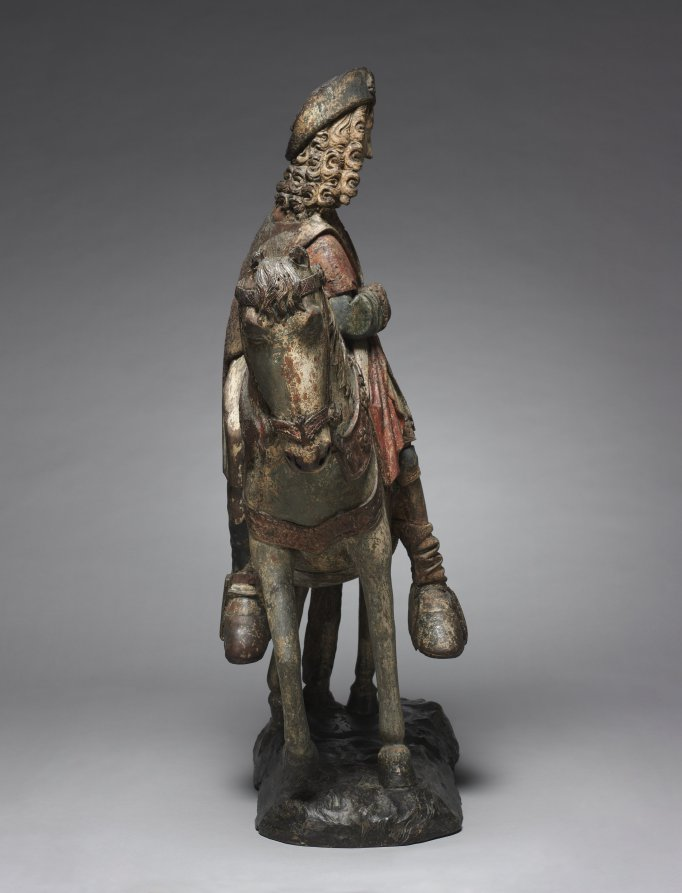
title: Saint Martin of Tours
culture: Northeast France or Flanders, 15th century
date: c. 1480–1500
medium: polychromed walnut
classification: Sculpture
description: According to tradition, Saint Martin was born during the reign of Constantine the Great (306–37 CE) and served as a member of the Roman cavalry in Gaul. There he earned a reputation for humility and boundless charity. During the severe winter of 322 CE at Amiens, Martin's compassion for others led him to divide his cloak with his sword, and to give half to a poor, naked beggar. This event, along with Martin's subsequent vision of the beggar as Christ, eventually led to the saint's widespread popularity throughout medieval Europe. Saint Martin was particularly venerated in the city of Tours where he served as bishop, where his tomb is located, and of which he remains the patron saint.